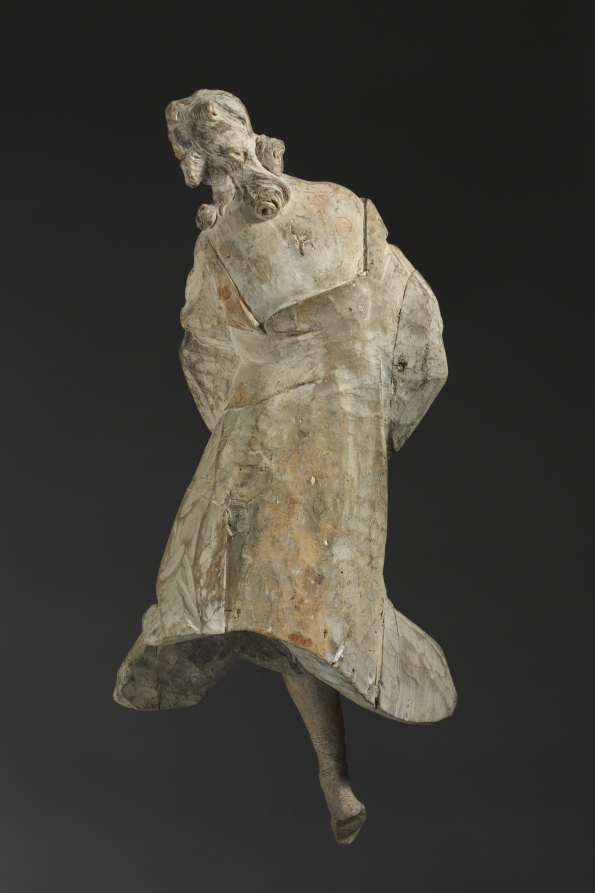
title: Kneeling Angel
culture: Germany, Munich, 18th century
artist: Ignaz Günther (German, 1725–1775)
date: c. 1760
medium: gessoed and painted wood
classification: Sculpture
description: This angel, and another now in the Philadelphia Museum of Art, were probably originally placed on either side of a tabernacle—a structure designed to hold the consecrated bread and wine of the Eucharist—on an altar in a Christian church or private chapel. The angels would originally have had wings, and the now plain surface of the sculpture would have been painted or gilded. Ignaz Günther was among the most sought-after carvers of religious sculpture in southern Germany. His virtuoso skill is particularly evident here in the angel’s pious expression and elegantly formed hands and feet.